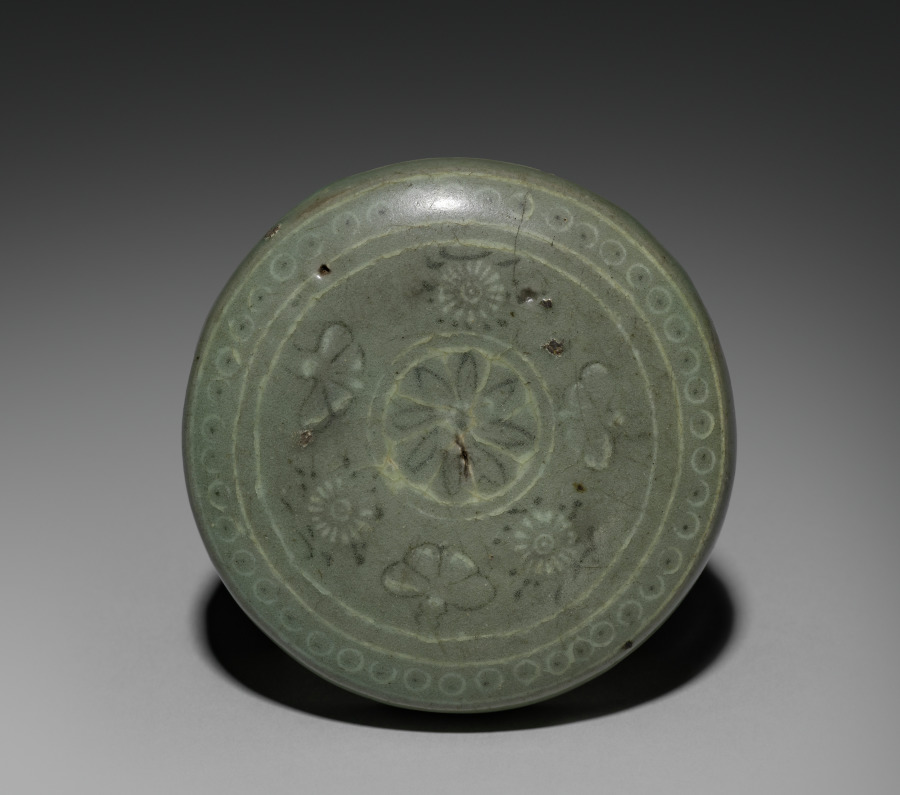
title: Pigment Box (lid)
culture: Korea, Goryeo dynasty (918–1392)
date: 918–1392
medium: inlaid celadon ware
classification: Ceramic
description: Celadons, spoons, seals, and bronze mirrors were the most common burial objects in tombs during the Goryeo period (918-1392). Once used to contain colored powder, rouge, and eyebrow gel for makeup, this small container was one of the standard goods that furnished elites' tombs. Both women and men used the grain powder of rice or millet for whitening their skin, safflower extract for rouge, and plant ash or soot for eyebrow gel. Yet, natural-looking make-up seems to have been the most favorable one in Korean according to the travelogue by Xu Jing (1091-1153), the Chinese diplomat who visited Korea in 1123.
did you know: This ceramic container was used to store either incense or cosmetics.